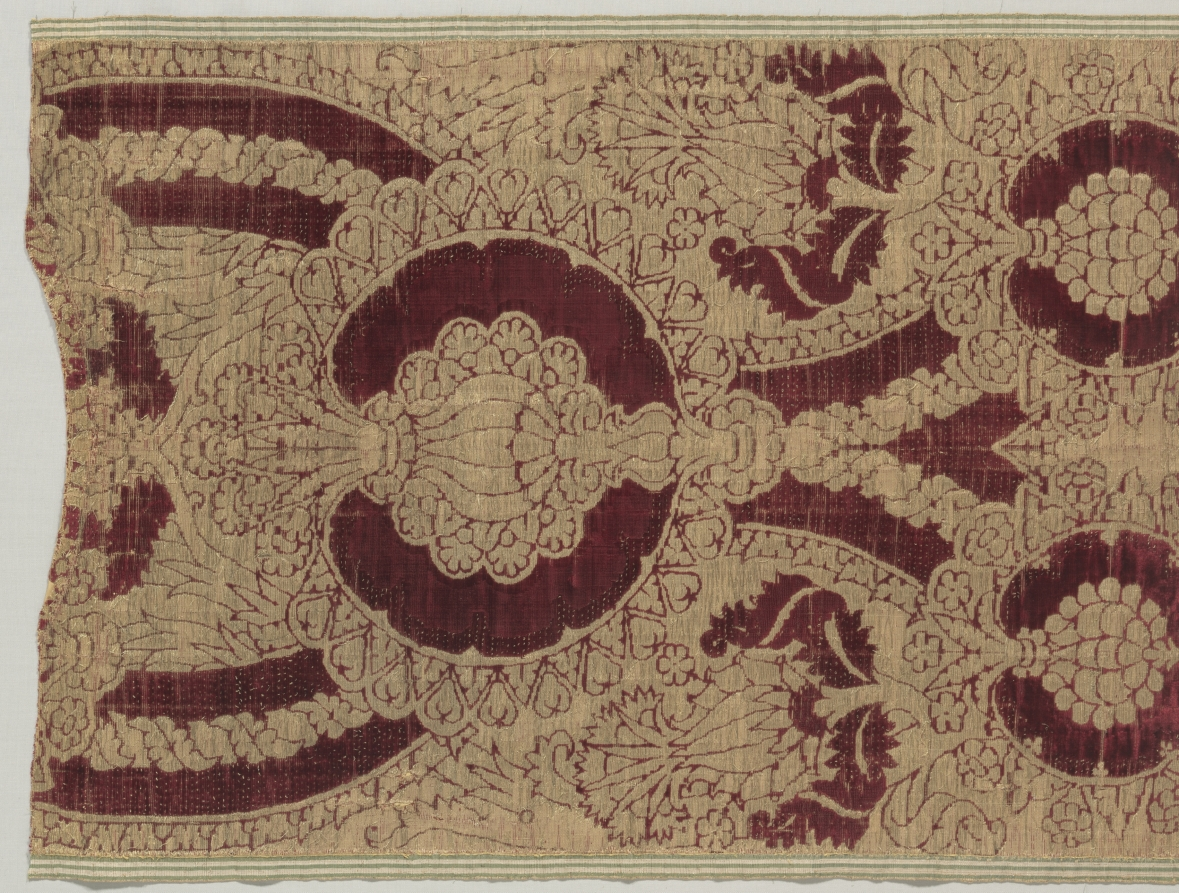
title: Silk Velvet with Gold in Pomegranate Pattern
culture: Italy, possibly Florence, 15th century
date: 1450–1500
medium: silk, gold thread; velvet: cut pile in two heights, uncut pile loops, gold-thread loops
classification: Velvet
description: Luxurious silk velvets with expensive gold thread were symbols of wealth and power. The finest velvets during the 1400s have two, or even three, heights of lush projecting pile. This fashionably large pomegranate pattern features exorbitant gold-thread loops enriching the lower level and a plain higher level. The curved upper and lower contours suggest this was the back of a sleeveless ecclesiastical vestment known as a chasuble. The striped green and ivory selvage was the equivalent of a label, required by law. It identified the fiber content, its quality, and quantity, which determined the price. Selling prices reflected the costs of the raw materials—gold thread, silk, and dyestuffs. Compensation for artisans was generally minimal.